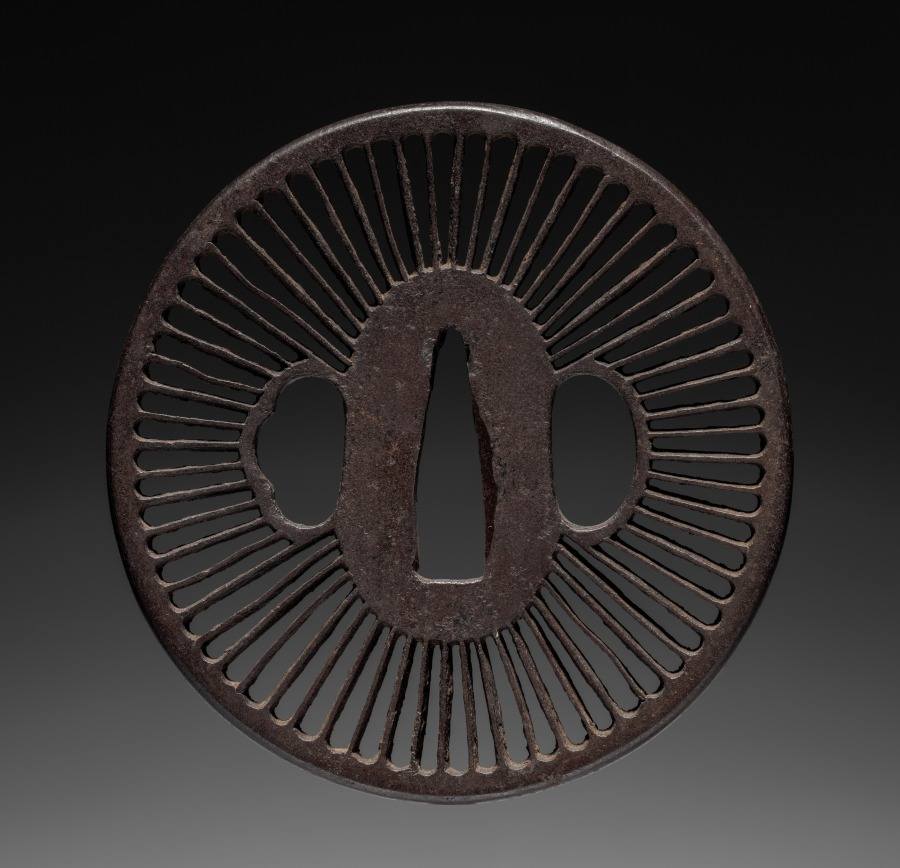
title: Sword Guard (Tsuba)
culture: Japan, possibly Edo period (1615-1868)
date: c. 1615–1868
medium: iron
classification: Arms and Armor